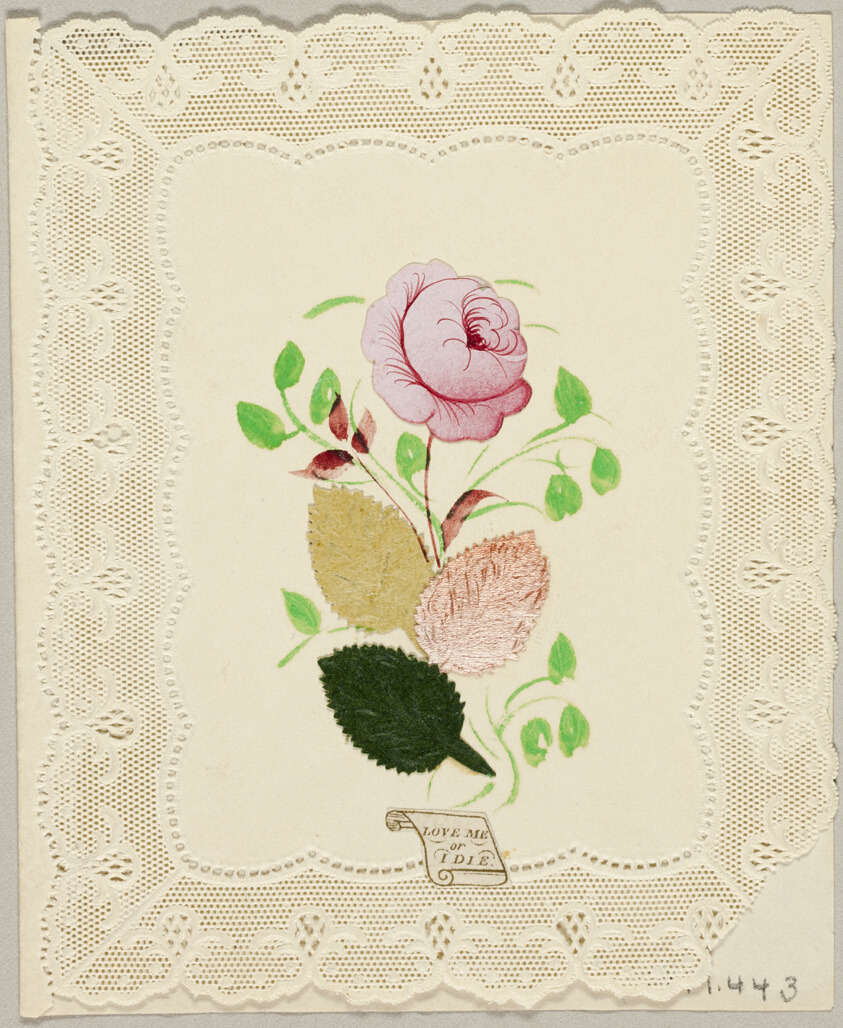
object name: Drawing and Watercolor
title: Love Me or I Die (Valentine)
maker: Joseph Addenbrooke (English, 19th century)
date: c. 1840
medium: Collaged elements with watercolor on cut and embossed ivory wove paper (lace)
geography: England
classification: valentine; prints and drawing; paper